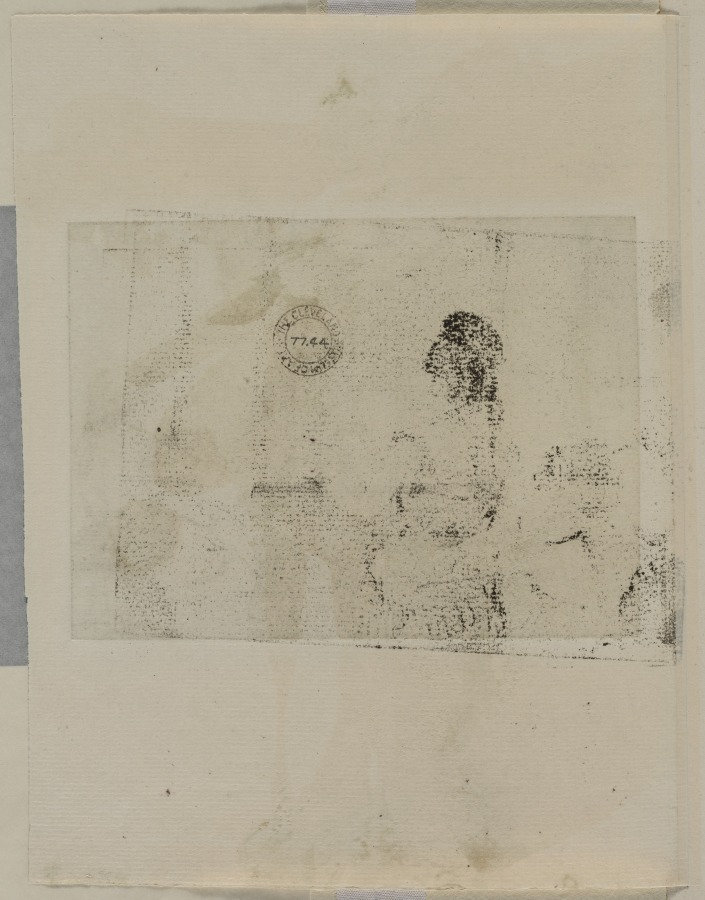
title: In the Salon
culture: France, 19th century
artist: Edgar Degas (French, 1834–1917)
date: c. 1880s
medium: monotype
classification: Print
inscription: Watermark: HALLINES [with fragment of shield]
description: Edgar Degas's series of monotypes depicting brothels depicted a hidden aspect of Parisian life. Degas's interest in the subject paralleled the theme of the prostitute in naturalist novels of the era by Emile Zola and Edmond and Jules de Goncourt, and echoed the then-contemporary debate about the regulation—or abolition—of prostitution in Paris. In this print, three women await their clients under a luminous globed chandelier. A standing figure reaches out her left arm as if to beckon an unseen visitor.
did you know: Edgar Degas's series of brothel monotypes was never exhibited during his lifetime and remained in the privacy of the artist's studio until his death.